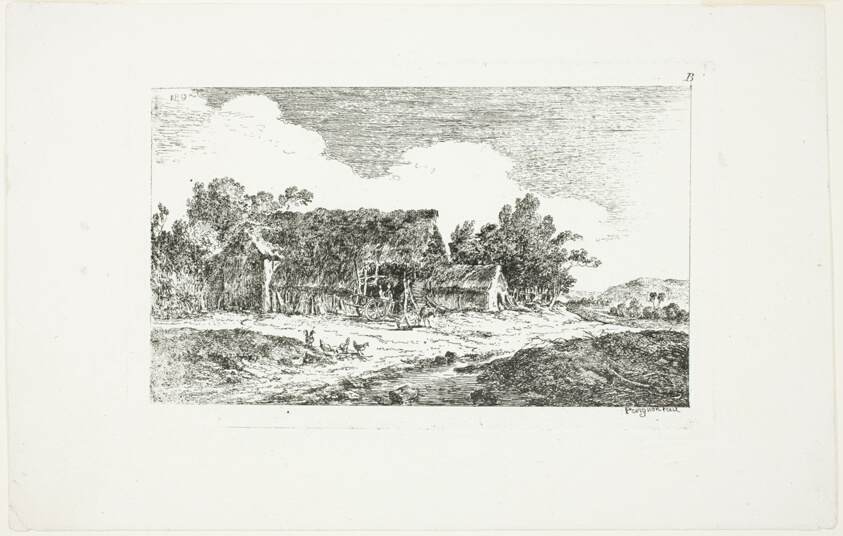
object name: Print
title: Landscape, from Deuxieme Cahier de Paysage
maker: Nicolas Pérignon (French, 1726-1782)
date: 1772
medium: Etching on off-white laid paper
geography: France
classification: etching; paper; print; prints and drawing